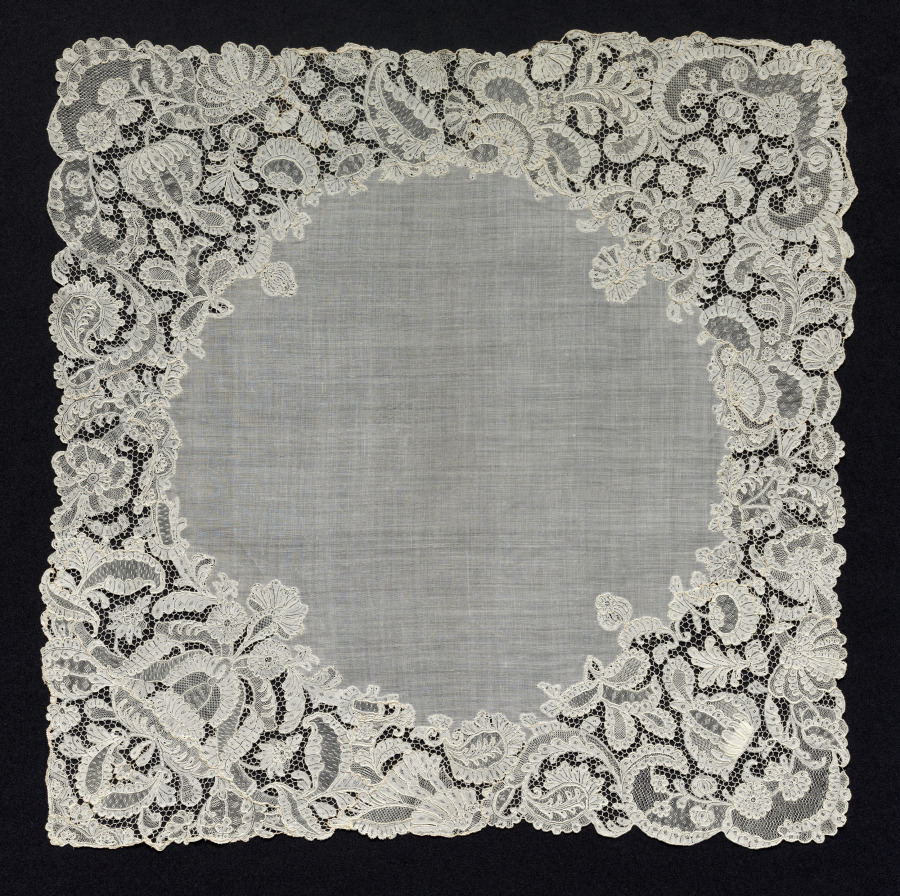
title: Lace Handkerchief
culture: France, Alençon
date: 1740–60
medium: Plain weave linen center with needle lace (Point d'Alençon) border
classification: Lace